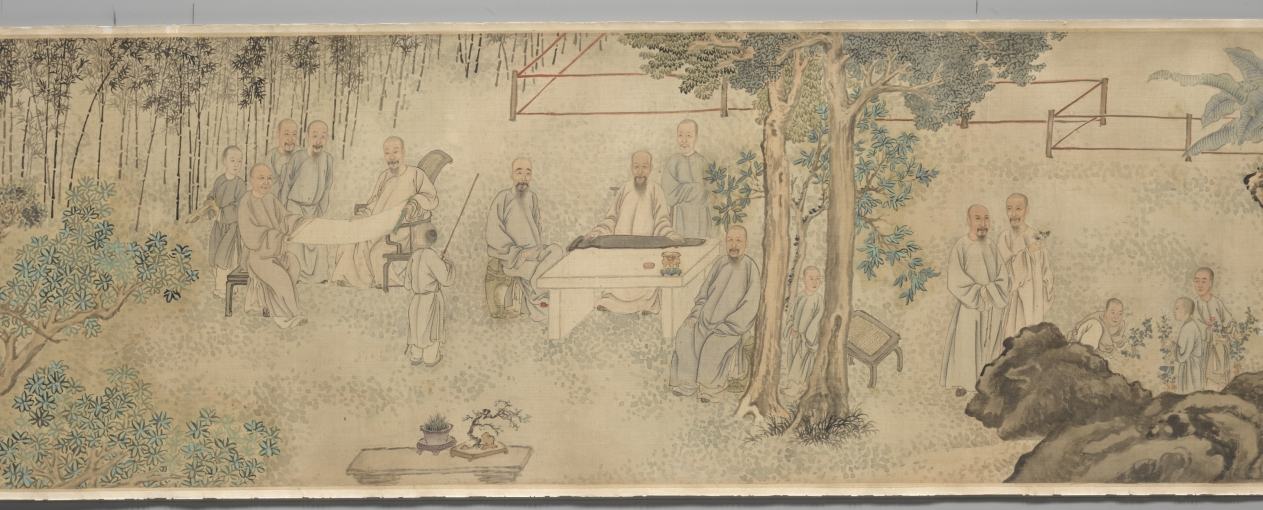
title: The Ninth Day Literary Gathering at Xing’an [Temporary Retreat]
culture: China, Qing dynasty (1644-1911)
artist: Fang Shishu (Chinese, 1693–1751)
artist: and Ye Fanglin (Chinese, active late 1600s–mid-1700s)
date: 1743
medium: Handscroll; ink and color on silk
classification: Painting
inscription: Fang Shishu's seal at beginning of painting: Ou ran shi de 偶然拾得. Ye Fanglin's seal at end of painting: Fanglin 芳林. Frontispiece title dated 1743 and 3 seals of Chen Bangyan 陳邦彦 (1678-1752).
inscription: 行庵在揚州北郭天寧寺西隅，馬君嶰谷半槎兄弟購僧房隙地所築，以為游息之處也。寺為晉謝太傅別墅。西隅饒古木，䨴鬱陰森，入林最僻，不知其近郛郭。庵居其中，無斲礱髤采之飾，惟軒庭多得清蔭，來憩者每流連而不能去。乾隆癸亥九日，積雨既收，風日清美，遂約同人，咸集於斯，中縣［懸］仇英白描陶靖節像，采黃花，酌白醪為供，乃以人世難逢開口笑，菊花雖插滿頭歸分韻賦詩。陶陶衎衎，觴詠竟日。既逾月，吳中寫真葉君敬［震］初適來，群貌小像，合為一卷，方君環山補景，命曰九日行庵文讌圖。裝池成，將各書所作於後，而囑鶚為之記。記按圖中共坐短榻者二人：右箕踞者，為武陵胡復齋先生期恆；左抱膝者，為天門唐南軒先生建中也。坐繩床者二人：中手牋者，歙方環山士庶；左仰首如欲語者，江都閔玉井華也。一人坐藤塾捻髭者，鄞全謝山祖望也。一人倚石坐若凝思者，臨潼張漁川四科也。樹下二人：離立把菊者，錢唐厲樊榭鶚；袖手者，錢唐陳竹町章也。一人憑石床坐撫琴者，江都程香溪先生夢星也。聽者三人：一人垂袖立者，祁門馬半查曰璐；二人坐瓷塾，左倚樹、右跂腳者，歙方西疇士疌 、汪恬齋玉樞也。二人對坐展卷者，左祁門馬嶰谷曰琯，右吳江王梅沂藻也。一人觀者，負手立於右，江都陸南圻鐘輝也。從後相倚觀者一人，歙洪曲溪振珂也。童子種菊者三人：樹間侍立者一人，撰杖、執卷者各一人。其植有蕉、有竹，又有雜樹，作丹黃青碧之色，紀時也。夫重九佳名，舉俗所重，而高常侍歎獨坐而搔首，陸天隨感登高以剫門，無其時地與人耳。今吾儕幸生太平，遇勝地，又皆素心有文之侶，固人世不可多得之會；而此十六人者，或土斷，或客游，聚散不常。異日者，歲月遷流，撫節物以有懷，一披此圖，悅如晤對。將來覽者，或亦不異此意乎。甲子夏五十有四日厲鴞記並書。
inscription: 揚州為江北大都會，居民連甍接楹，笙歌輿從，竟日喧聚，其於淸歌雅集，葢罕矣。城北天寧寺，為晉謝公駐節時所游息，其中有行庵，吾友馬君嶰谷、半查兄弟之小築也。地不踰五畝，而老樹古藤，森蔚相望，皆千百年物，間以修竹，春鳥秋蟲，更唱迭和，其間曲廊高榭，位置閑適。出門未數百步，即黃塵濁流極目，令人作惡。而此中獨蕭然有人外之思。乾隆八年九日，嶰谷兄弟招集同社一十四人祀陶公，出所藏仇實父白描像懸於閣上，各賦一詩。予方留滯西泠，未得預也。又踰旬而予至，諸君方擬繪圖記事，嶰谷曰：是不可無君。乃以展日更舉，令予得陪卷軸之末；而洪君曲溪，兩度皆以病失約，然故吟社中人也，亦補入焉。予太息謂諸君曰：謝公之風流，千古如在；然其游息於斯也，則與東山賓從之樂稍不同矣。公之為是行也，蓋以符氏之亂，思北定中原也。而其時公巳困於讒口，不自安於朝；雖在河朔極有可乘之會，而神明內索，徘徊不克自前。老師左次，竟無尺寸之功，坐失事幾。吾常過邵伯之埭，吊法雲之荒祠，未嘗不喟然累啼，以為明德之衰也。至若九日嘉名，陶公高格，固在羲皇懷葛之間；然而讀其 止酒之詩，蒼梧漢水之感，以瘦詞寄其孤憤則夫黃花白酒，蓋亦不得巳而漫與焉者。今吾輩生逢太平之日，書淫墨癖，是處留連，胸次中了無一事，為江湖之幸民，論人雖甚媿，論其時與地，則不可不私相慶也。諸君曰：善。圖之詳巳見於厲君樊榭記中。予之許為嶰谷兄弟序斯圖也，三年於茲；今夏重披圖捉筆，而唐丈南軒，巳化為異物矣。對酒當歌，人生幾何，願與諸君並日相遇從焉。丙寅夏杪孤山社小泉翁全祖望序。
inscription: 6 additional colophons and 15 additional seals: 1 colophon, dated 1746, and 1 seal of Huang Zhijun 黃之雋 (1668-after 1746); 1 colophon and 2 seals of Zha Xiang 查祥 (1718 jinshi); 1 colophon, dated 1746, and 3 seals of Zhang Siwen 張思問; 1 colophon, dated 1748, and 4 seals of Shao Dong 卲東 (1721 jinshi); 1 colophon, dated 1753, and 2 seals of Fang Shiju 方世舉 (signing as Fang Funan 方扶南); 1 colophon, dated 1808, of Ruan Yuan 阮元 (1764–1849); 3 seals unidentified.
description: By the 1700s, Yangzhou was flourishing both economically and culturally as the most prosperous city in China, having surpassed all other Jiangnan cities in their creation of gardens. This group portrait commemorates a literary gathering in the private garden of the salt merchants and art patrons Ma Yueguan (1688–1755) and his brother Ma Yuelu (1697–after 1766) in Yangzhou. Ma Yueguan received imperial recognition for providing financial aid and food relief for those affected by flood and drought. Ma Yueguan is seen seated at the end of the painting holding an open scroll while Ma Yuelu stands behind the qin instrument player. Among the guests were officials, scholars, poets, painters, and merchants, a mix of local members of a poetry club reflecting increasing social diversity.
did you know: The two hosts and their fourteen guests were all officials, scholars, poets, painters, and salt merchants.